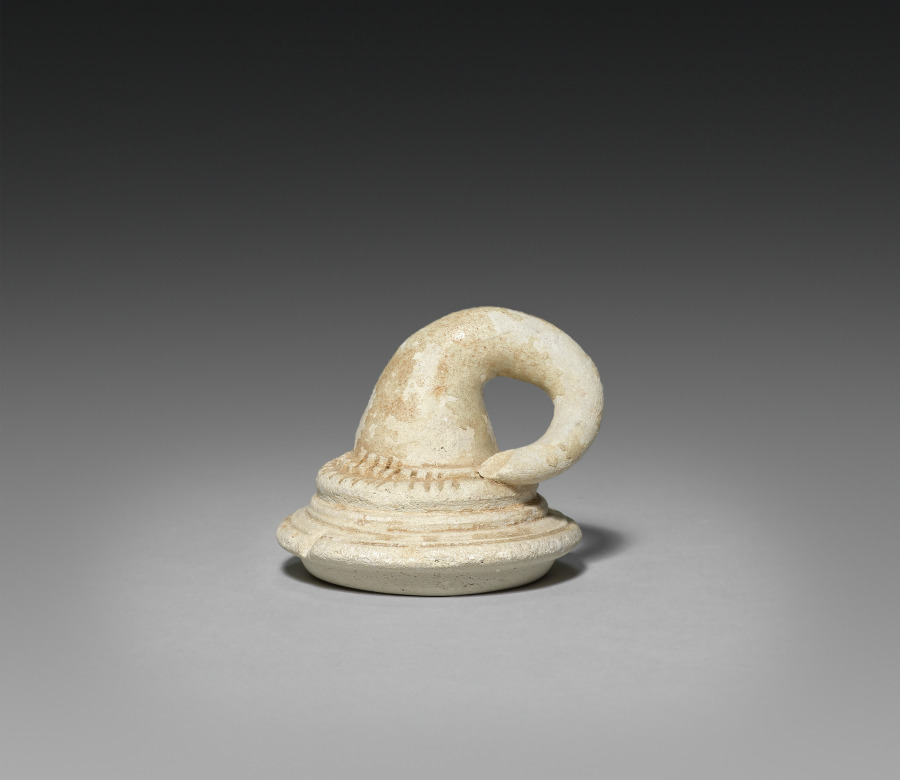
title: Jar in the Shape of a Fruit (Lid)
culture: Cambodia, Northeast Thai kiln, Khmer Ware, Angkor Wat/Bayon period, 12th century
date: 1100s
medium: glazed pottery with brown slip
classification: Ceramic